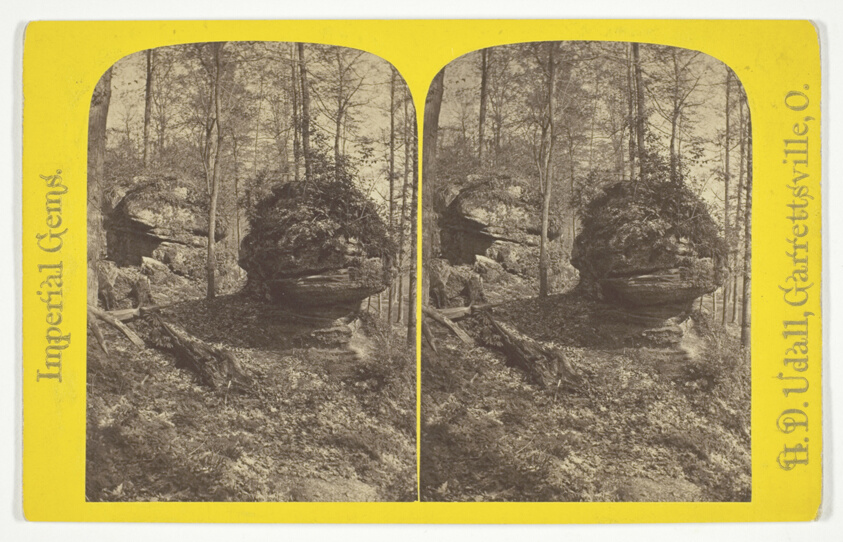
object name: Photograph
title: Turtle Rock, No. 23 from the series "Imperial Gems"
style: 19th century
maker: H. D. Udall; American, active late 19th century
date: 1875/99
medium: Albumen print, stereo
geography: Ohio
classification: photography; photograph